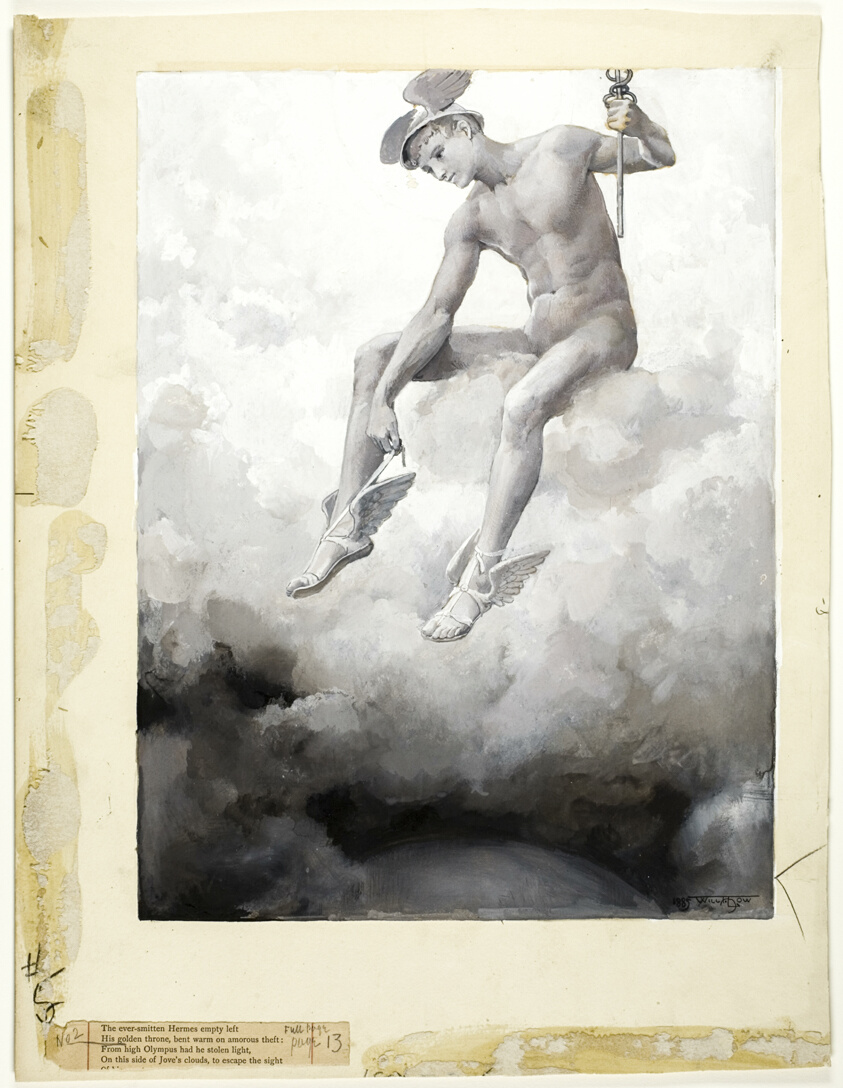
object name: Drawing and Watercolor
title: On This Side of Jove's Clouds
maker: Will Hicock Low (American, 1853-1932)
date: 1885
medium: Black, gray and white gouache on cream wood-pulp laminate board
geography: United States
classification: drawings (visual works); prints and drawing